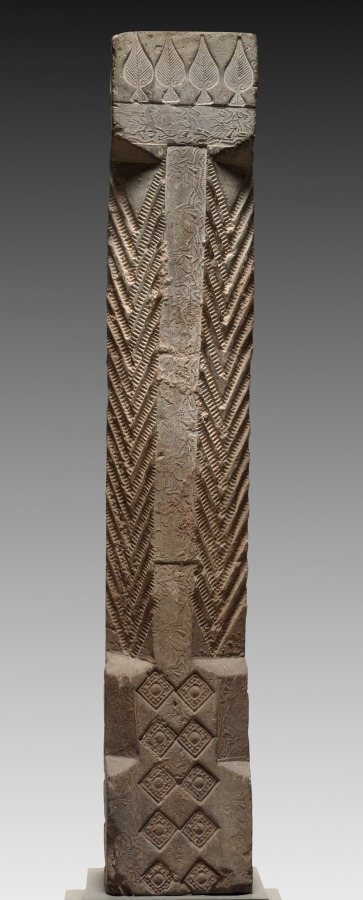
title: Hollow Tile: Column from Tomb-Chamber Doorway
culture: China, Han dynasty (202 BCE–220 CE)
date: 100–200 CE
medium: earthenware, die-stamped relief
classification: Ceramic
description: Striding tigers (top), racing horsemen (right column), and reverent officials (left column) are stamped into the surface of this underground portal to a tomb. The doorway preserves in stone the post-and-lintel structure, a basic element of Chinese wooden architecture. By the first century CE, a revolution in Chinese tomb construction and furnishing had taken place. Tombs lined with decorated bricks and tiles replace the earlier tombs constructed with only rammed-earth walls. Ceramic surrogates or models of stoves, houses, servants, and pets filled these more durable chambers, symbolically extending the creature comforts of this world into the world after death.